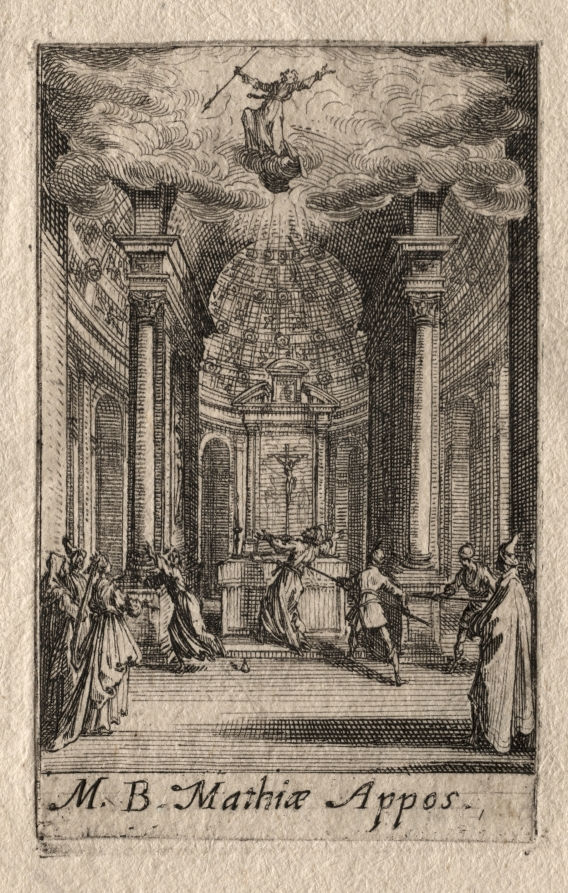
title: The Martyrdom of the Apostles: St. Matthias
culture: France, 17th century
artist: Jacques Callot (French, 1592–1635)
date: ca. 1632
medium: etching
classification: Print